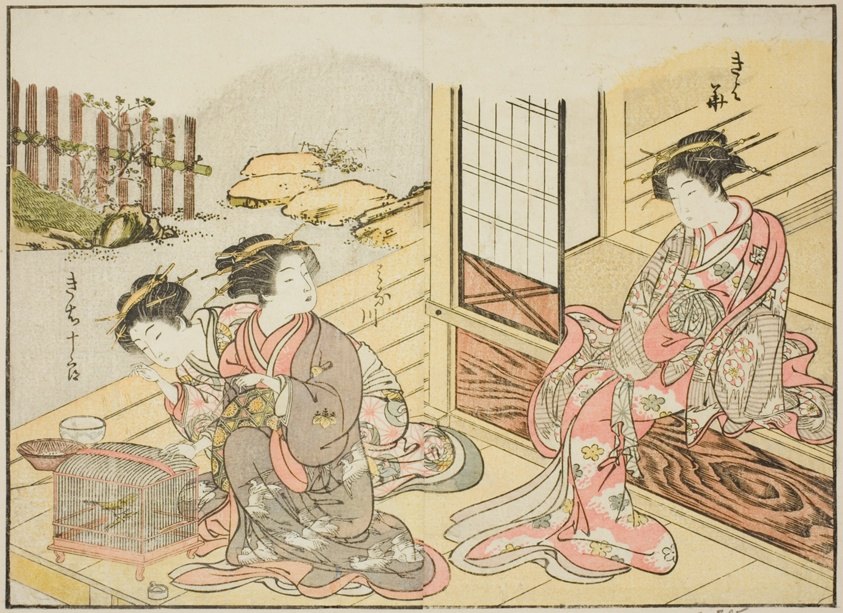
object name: Print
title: Courtesans of the Kagemanjiya, from the book "Mirror of Beautiful Women of the Pleasure Quarters (Seiro bijin awase sugata kagami)," vol. 1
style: Japanese (culture or style)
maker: Katsukawa Shunsho; Japanese, 1726-1792; Kitao Shigemasa; Japanese, 1739-1820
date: 1776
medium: Color woodblock print; double-page illustration cut from a book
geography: Japan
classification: print; asian art